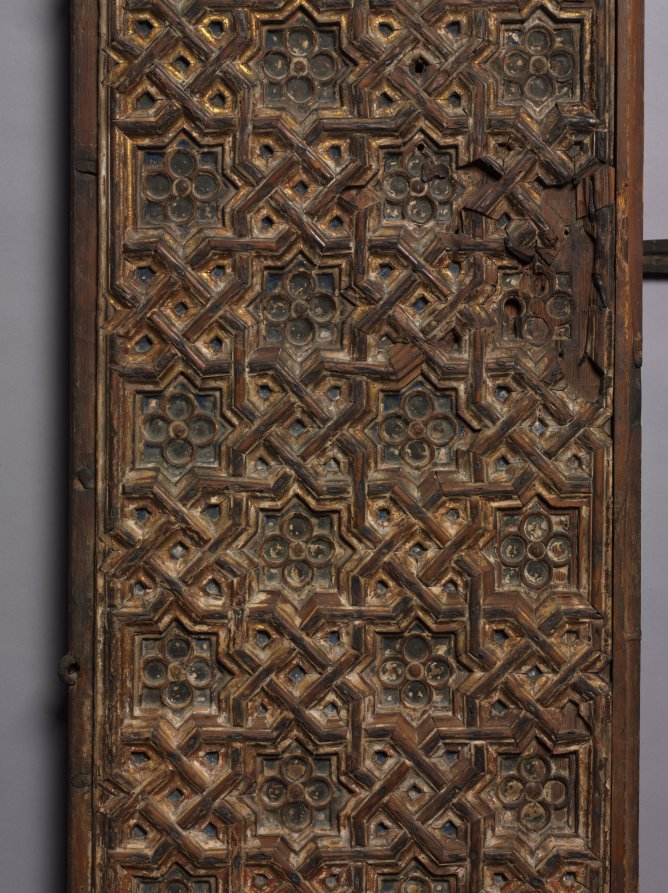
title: Door (left)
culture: Spain, early 15th century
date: early 1400s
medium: gilded and painted wood (pine)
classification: Furniture and woodwork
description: Typical of Muslim-inspired ornamentation, these doors reflect a love of geometric decoration stemming from a non-realistic artistic tradition. They consist of applied wood strips that form eight-point stars, flowers, and geometric interlace designs. Such designs are reflected in the tiles, ceramic vessels, and metalwork of Muslim-occupied Spain. The origin of the doors is not known, but they may have belonged to a palace or domestic residence. In 711, the Moors had invaded and conquered nearly the entire peninsula. During the next 750 years, independent Muslim states were established, and the entire area of Muslim control became known as Al-Andalus. Muslim philosophers and scientists developed knowledge in areas like medicine, optics, algebra, chemistry, and geometry, as seen here. Typical of Muslim-inspired ornamentation, these doors reflect a love of geometric decoration stemming from a non-realistic artistic tradition. They consist of applied wood strips that form eight-point stars, flowers, and geometric interlace designs. Such designs are reflected in the tiles, ceramic vessels, and metalwork of Muslim-occupied Spain. The origin of the doors is not known, but they may have belonged to a palace or domestic residence.